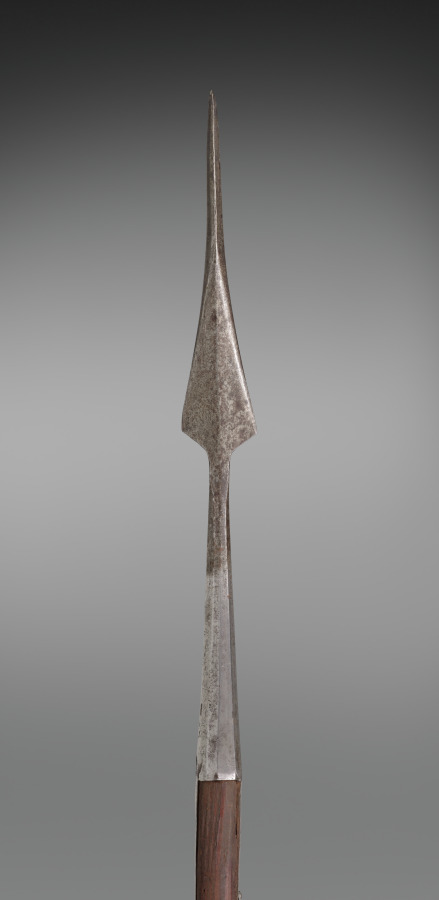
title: Banner with Royal Coat of Arms of Great Britian (pole)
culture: Great Britian, probably England, 18th century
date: 1700s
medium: wood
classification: Arms and Armor